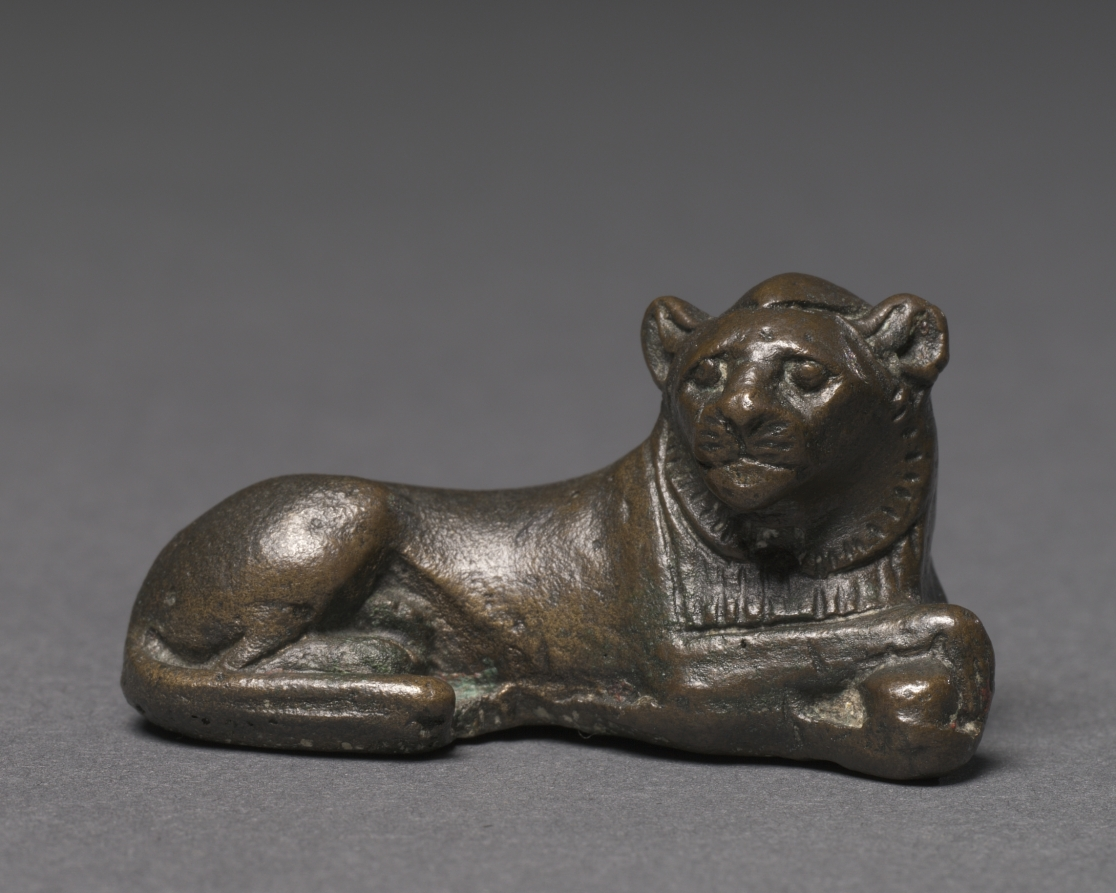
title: Weight in the Form of a Lion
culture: Egypt, New Kingdom (1540–1069 BCE), Dynasty 18, reign of Amenhotep III (1390–1352 BCE)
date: c. 1391–1353 BCE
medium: leaded tin-bronze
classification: Implements